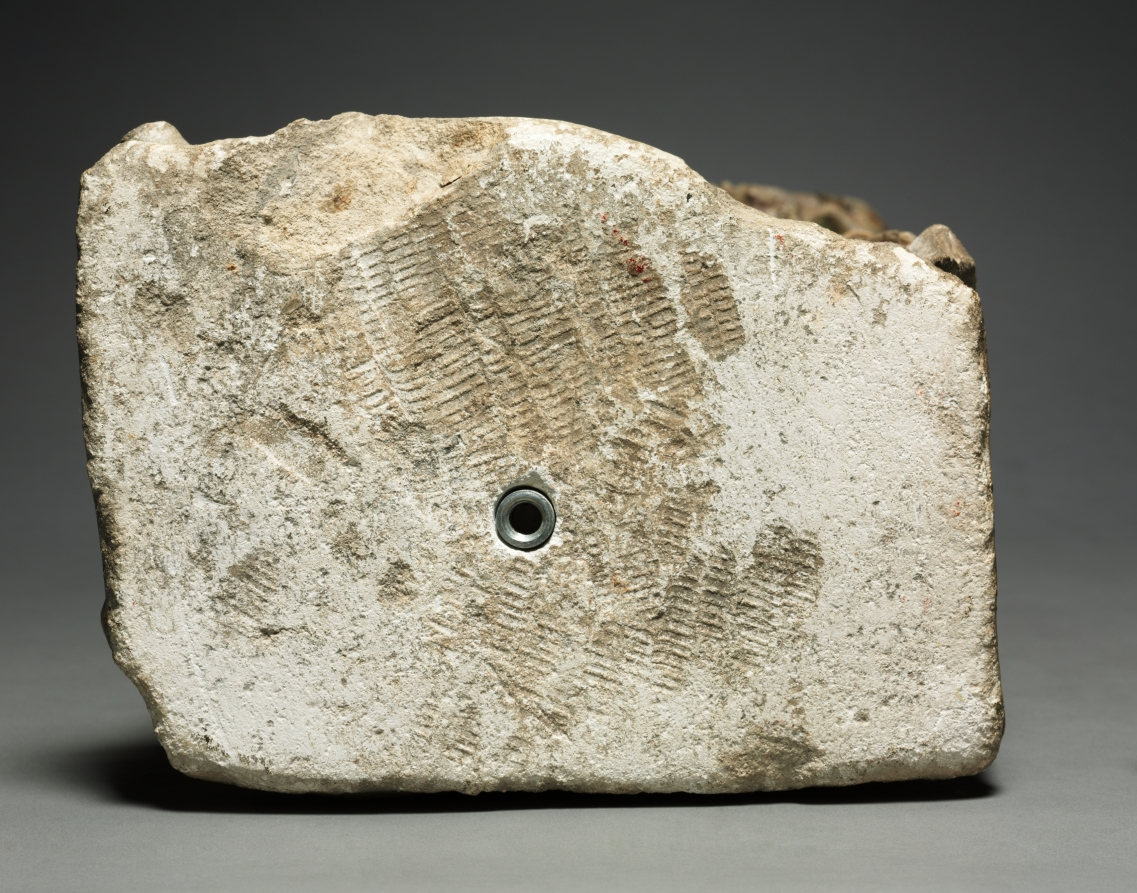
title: Virgin and Child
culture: France, Lorraine, 14th century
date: c. 1315–20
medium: limestone with traces of polychromy and gilding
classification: Sculpture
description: This graceful Virgin and child is a beautiful example from a large number of such figures produced in Lorraine, in eastern France, during the early 1300s. Lorraine at the time had a well-established artistic tradition and was under the rule of the Counts of Bar with established cultural links to both Flanders and England. Many of the surviving Lorraine Virgins share common characteristics consistent with this example--the swaying posture, with the weight of the Virgin placed on the left foot; and an open mantle with an exposed belted gown, the girdle itself trailing to the ground and ornamented with rosettes. Such standing figures were likely made for use in parish churches, cathedrals, aristocratic oratories, and monastic chapels, and attest to the intense veneration rendered to the Virgin during the period.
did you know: The CMA has a rare example of a similar woman’s belt (1930.742).